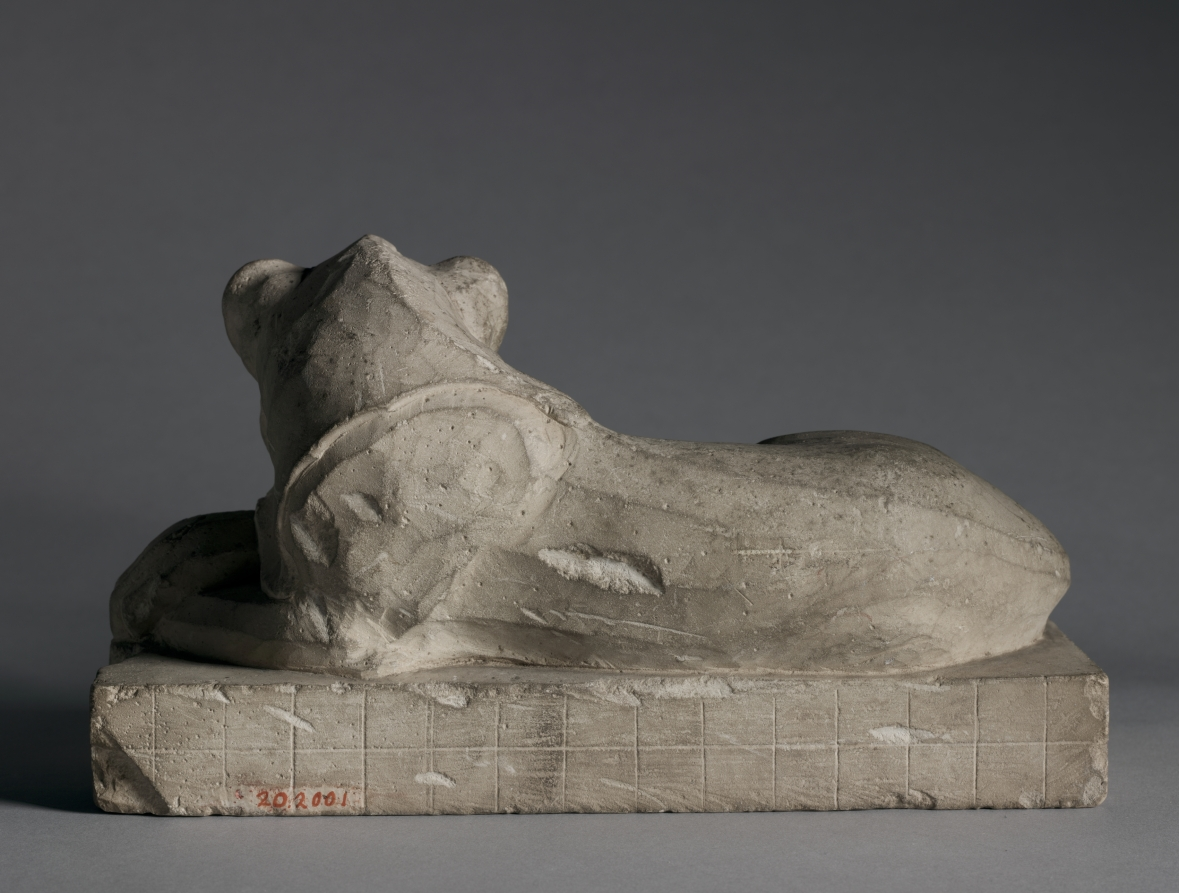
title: Statuette of a Lion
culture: Egypt, Late period (715–332 BCE), Dynasty 30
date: 380–246 BCE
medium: limestone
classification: Sculpture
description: Lions in Egyptian art are usually shown prone and relaxed, and usually represent the king. But this statuette probably represents the lion god Mahes who had a great temple at Leontopolis ("Lion-City") in the Delta where lions were kept. We know from classical authors that the temple maintained musicians to play to the lions to calm their nerves.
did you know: In antiquity, lions were often associated with rulers and this miniature sculpture likely depicts the Egyptian lion god Mahes. In ancient Egypt, a special city known as Leontopolis, or "Lion-City," had a temple dedicated to this deity in which live lions were kept. This small limestone sculpture would have been at home in such a location.